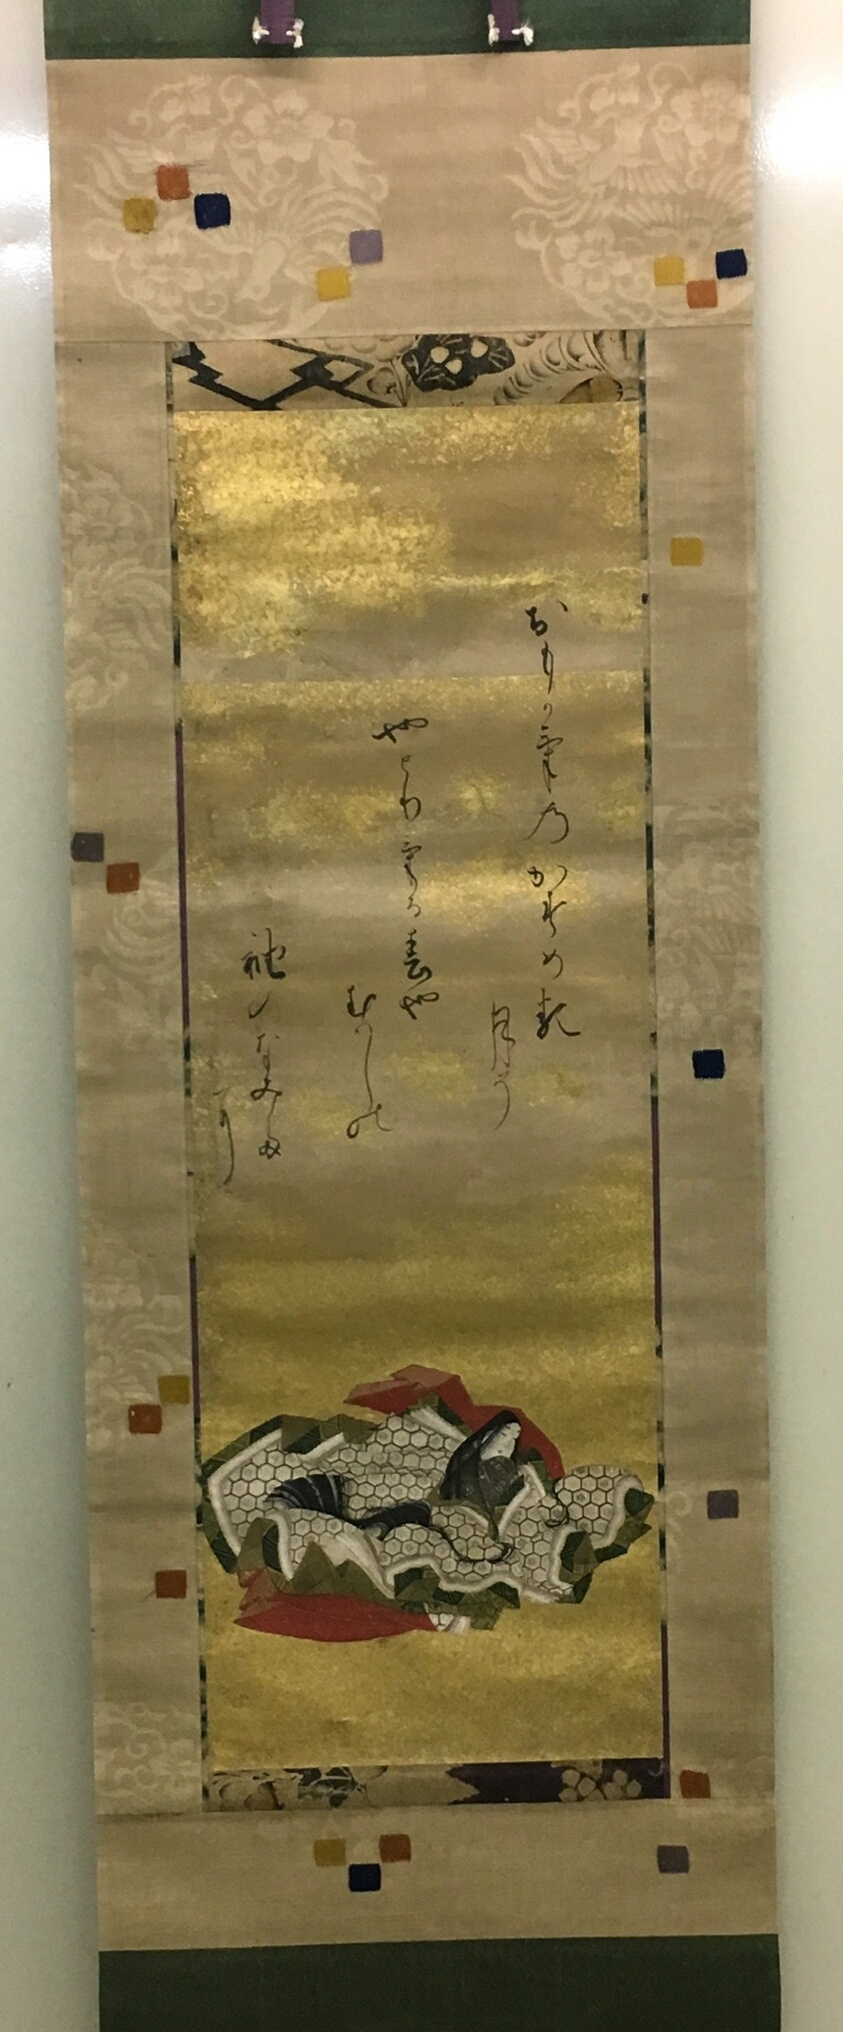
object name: Painting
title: The Poetess Kotaigogu no Daibu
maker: Attributed to Iwasa Matabei; Japanese, 1578-1650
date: Edo period (1610–1898)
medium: Hanging scroll; ink and colors on gold-flecked paper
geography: Japan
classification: hanging scroll; painting; asian art